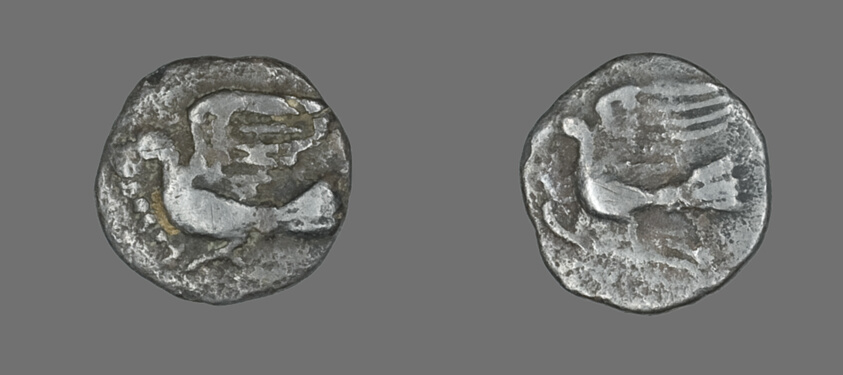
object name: Coin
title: Obol (Coin) Depicting a Dove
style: greek, ancient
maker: Greek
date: 400-323 BCE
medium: Silver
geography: Ancient Greece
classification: coin; ancient art